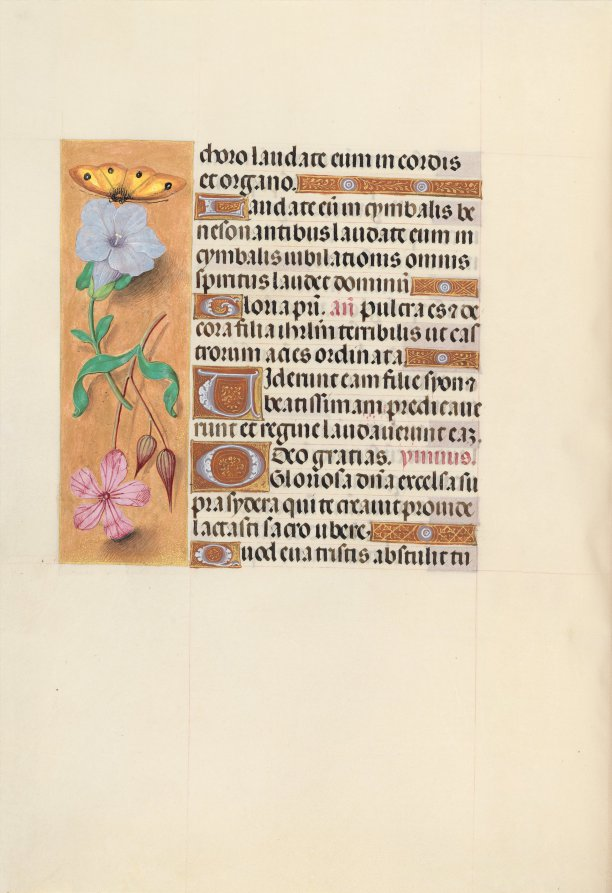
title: Hours of Queen Isabella the Catholic, Queen of Spain: Fol. 122v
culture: Flanders, Ghent and Bruges, late 15th century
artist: Master of the First Prayerbook of Maximillian (Flemish, c. 1444–1519)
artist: and Associates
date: c. 1500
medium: ink, tempera, and gold on vellum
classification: Bound Volume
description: This manuscript was illuminated by a circle of at least five highly organized manuscript painters active in the Flemish cities of Ghent and Bruges. The principal illuminator was Alexander Bening, who painted the majority of the book's miniatures. Manuscripts produced by this circle of artists are renowned for the decoration of their borders, which typically feature a rich variety of realistically-painted flowers, birds, and butterflies. This prayer book, called a book of hours, was intended not for a cleric, but for the private devotions of a lay person-in this case, Isabella the Catholic, Queen of Spain (1451-1504). Isabella's coat of arms embellishes the book's frontispiece. It is unlikely that the book was commissioned by the Queen herself; rather, she probably received it as a diplomatic gift from someone courting her patronage, perhaps Cardinal Francisco Jimenez de Cisneros. A Franciscan friar, Jimenez was dependent upon Isabella for his advancement, first to the post of Queen's confessor in 1492, and then to Archbishop of Toledo in 1495.